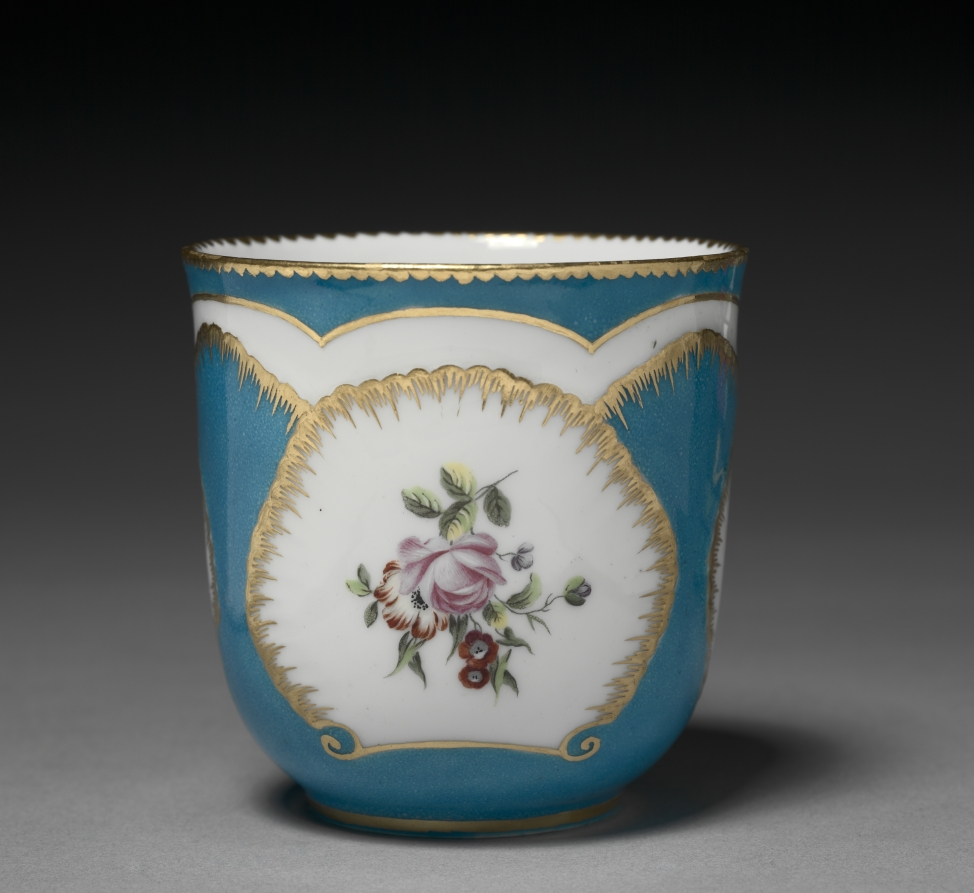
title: Cup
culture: France, Sèvres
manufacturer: Sèvres Porcelain Factory (French, est. 1756)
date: 1759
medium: soft-paste porcelain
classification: Ceramic